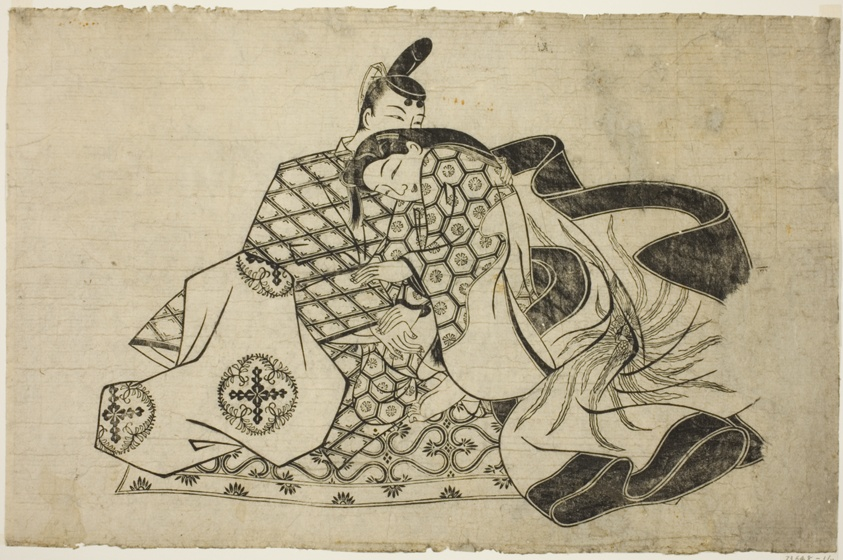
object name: Print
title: A sheet from a shunga album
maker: Japanese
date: 1679.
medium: Woodblock print; sumizuri-e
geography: Japan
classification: woodblock print; print; asian art